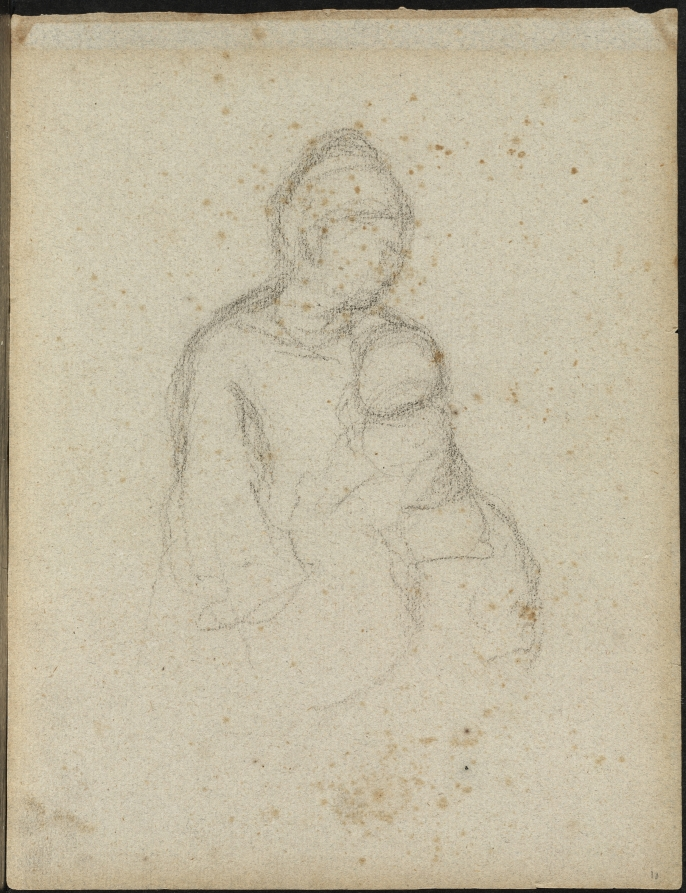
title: Mother and Child (recto)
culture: France, 19th century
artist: Paul Gauguin (French, 1848–1903)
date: 1870s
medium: black chalk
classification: Drawing